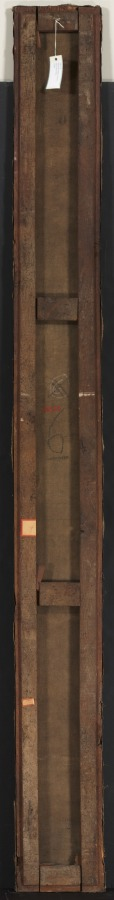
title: Decorative Panel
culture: France, 18th century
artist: Pierre Rousseau (French, 1751–1829)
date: 1790s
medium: oil on canvas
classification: Painting